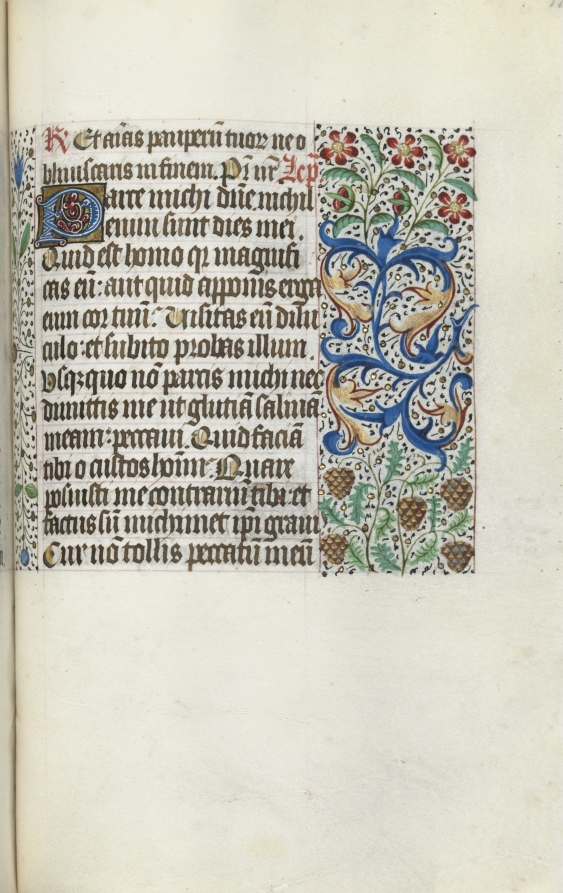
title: Book of Hours (Use of Rouen): fol. 115r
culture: France, Rouen, 15th century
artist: Master of the Geneva Latini (French, active Rouen, 1460–80)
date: c. 1470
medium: ink, tempera, and gold on vellum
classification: Bound Volume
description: In the late 1400s and early 1500s Rouen was an established and important center of book production. The city’s cathedral had a wealthy chapter that spent large sums of money to commission books and to maintain its extensive library. The stationers and booksellers would have likely been concentrated in or near the cathedral precinct. This artist, named after a manuscript now in Geneva, was Rouen’s principal illuminator during the second half of the 1400s.